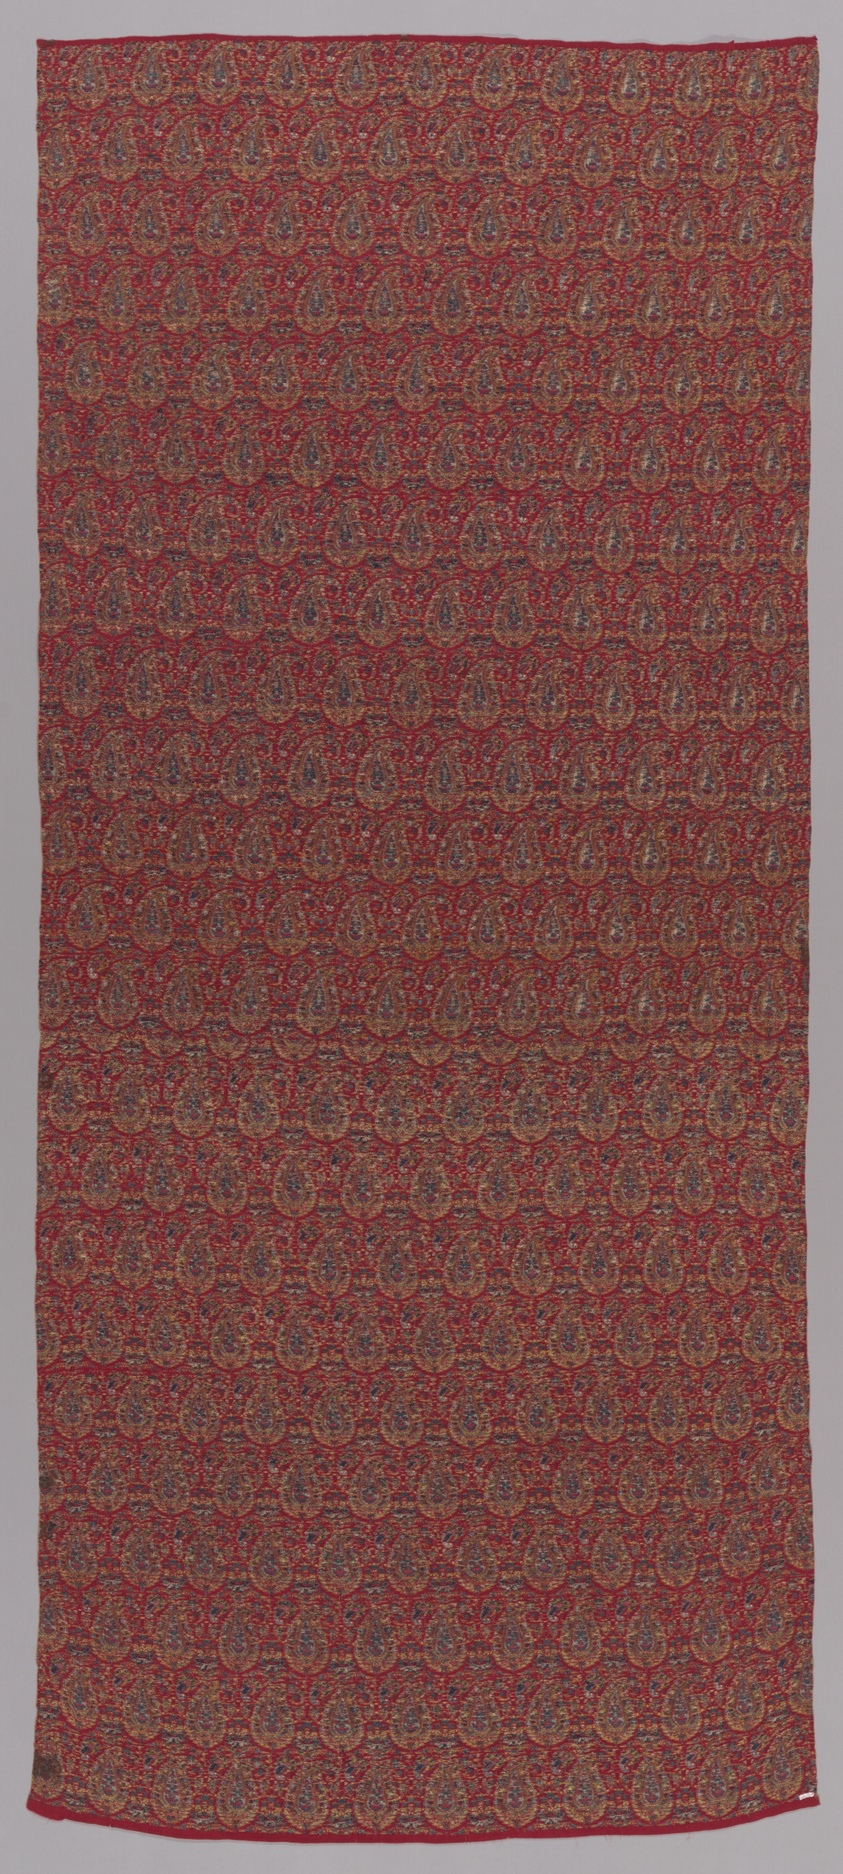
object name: Costume and Accessories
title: Kani Jamawar (Fabric for a Jama Coat or Shawl)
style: 19th century, kashmiri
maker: Probably Kashmir for the Persian market (present-day Iran)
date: 1825–75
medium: Wool, pieced double interlocking 2:2 'S' twill tapestry weave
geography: Kashmir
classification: textile; weaving; costume; garment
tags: paisley, botanical, floral, vines